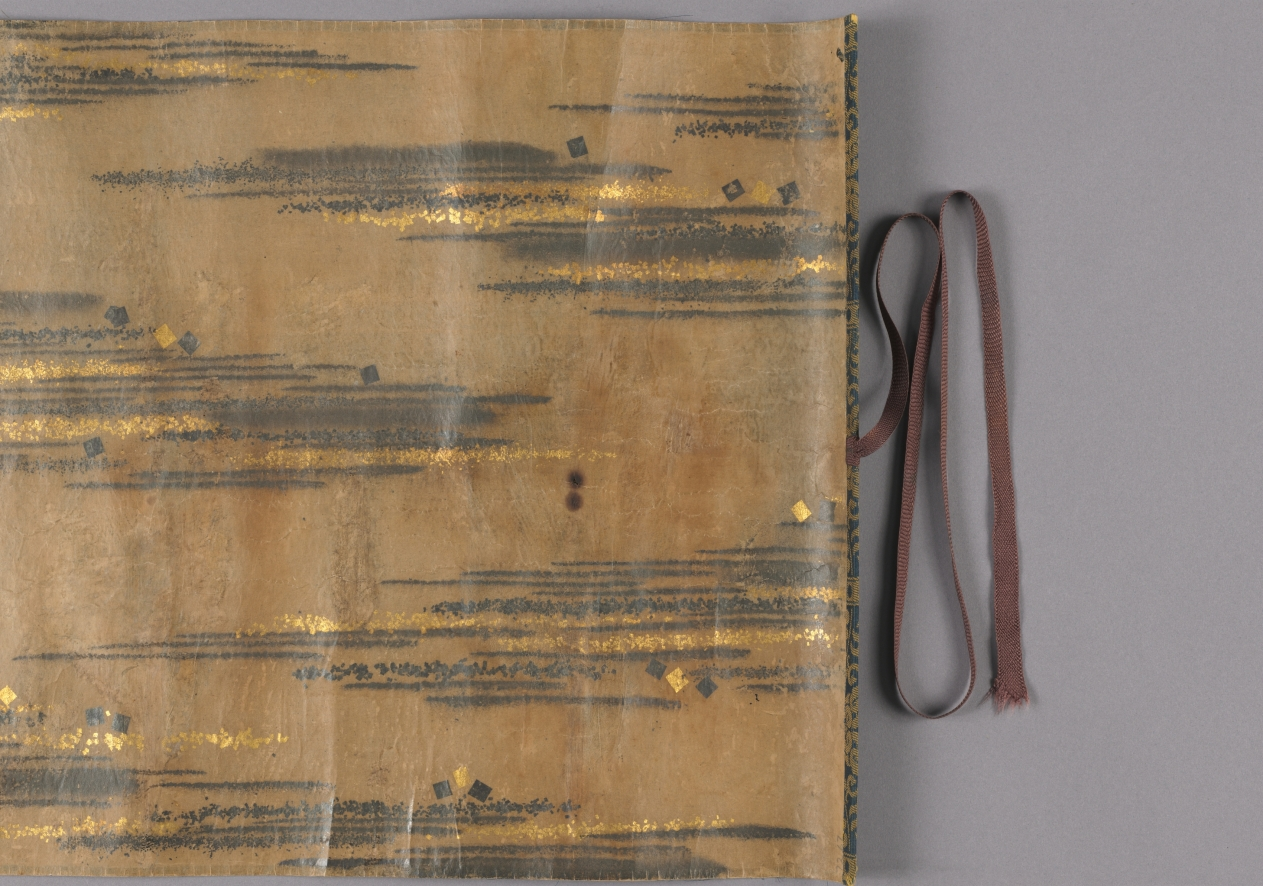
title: Selections from the Collection of Japanese Poems from Ancient and Modern Times (Kokin wakashū) with Design of Pines Along the Shore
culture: Japan, Momoyama period (1573-1615) to Edo period (1615-1858)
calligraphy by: Hon'ami Kōetsu (Japanese, 1558–1637)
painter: attributed to Tawaraya Sōtatsu (Japanese, c. 1570–c. 1640)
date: 1600s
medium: handscroll; ink on silk with gold and silver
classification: Calligraphy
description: The calligrapher and craftsman Hon’ami Kōetsu frequently collaborated with Tawaraya Sōtatsu, a painter who ran a studio that produced fans and screens. Sōtatsu’s work featured abstracted and flattened shapes, fields of color and gold, and asymmetry. In particular, motifs that appeared in small scale, such as flora and fauna, in early decorated Japanese papers were painted in a larger scale—blown up as if seen under a magnifying glass. For this handscroll, Kōetsu brushed poems from the autumn section of a poetry anthology onto silk with a landscape of pines in gold and silver likely painted by Sōtatsu.